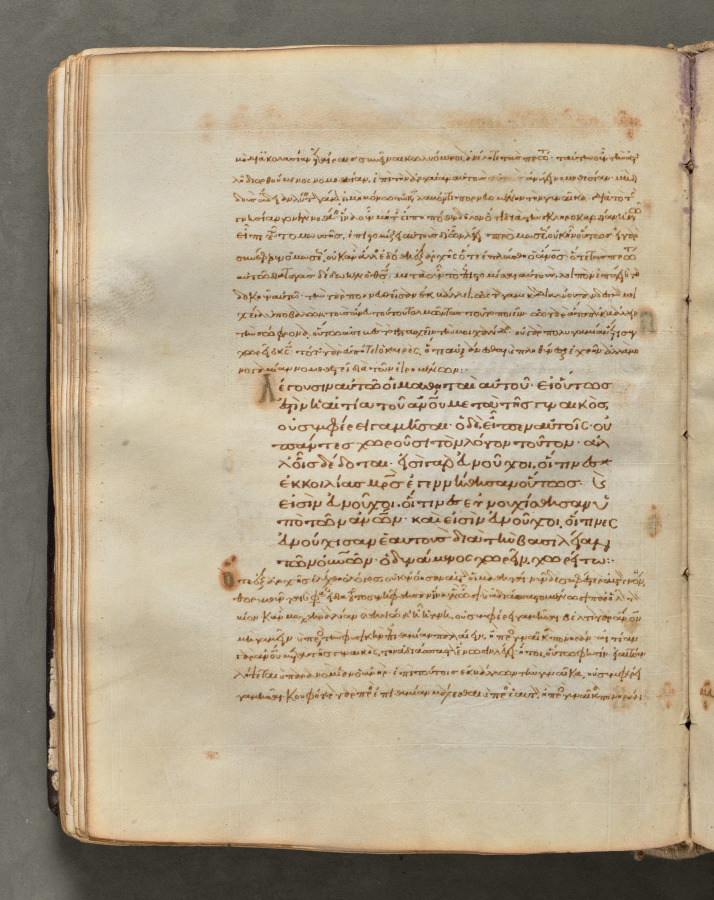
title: Text, folio 84 (verso), from a Gospel Book with Commentaries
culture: Byzantium, Constantinople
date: c. 1000–1100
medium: ink, tempera, and gold on vellum; leather binding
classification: Bound Volume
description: Each of the four gospels in this book opens on a page with brilliantly illuminated borders depicting the author of the text as well as birds-principally peacocks, symbols of the immortality of the soul-and fountains, representing the fountain of life and the salvation of the soul. This volume consists of 428 leaves with texts in Greek. Its level of sophistication suggests that it was probably written and decorated in a monastery in Constantinople.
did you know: Gospel Books were carried in procession through Byzantine churches.